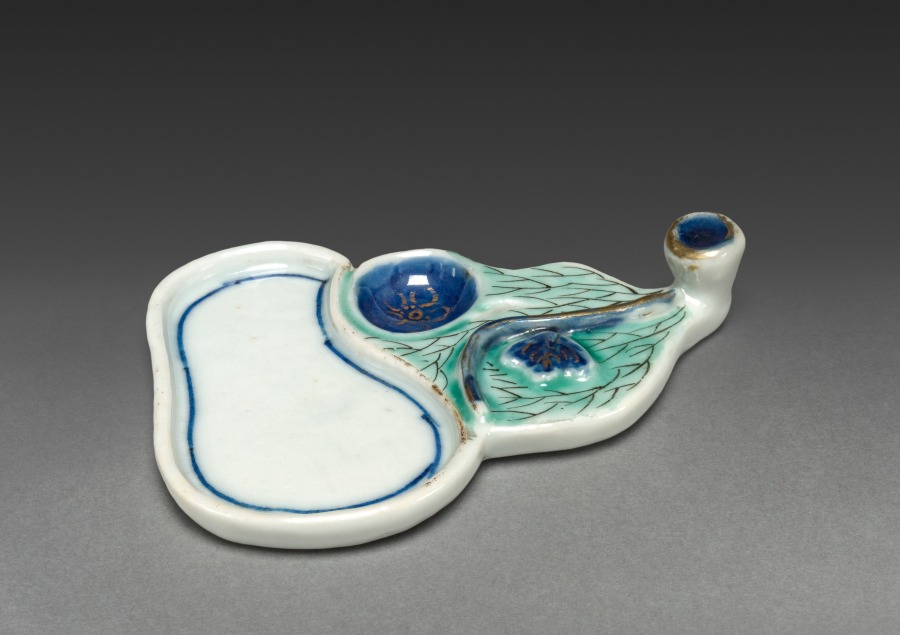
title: Ink Palette in the Shape of a Gourd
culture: Japan, Edo period (1615–1868)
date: 1700s to mid-1800s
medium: porcelain, molded and carved, with underglaze blue and overglaze green and gold enamels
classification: Ceramic